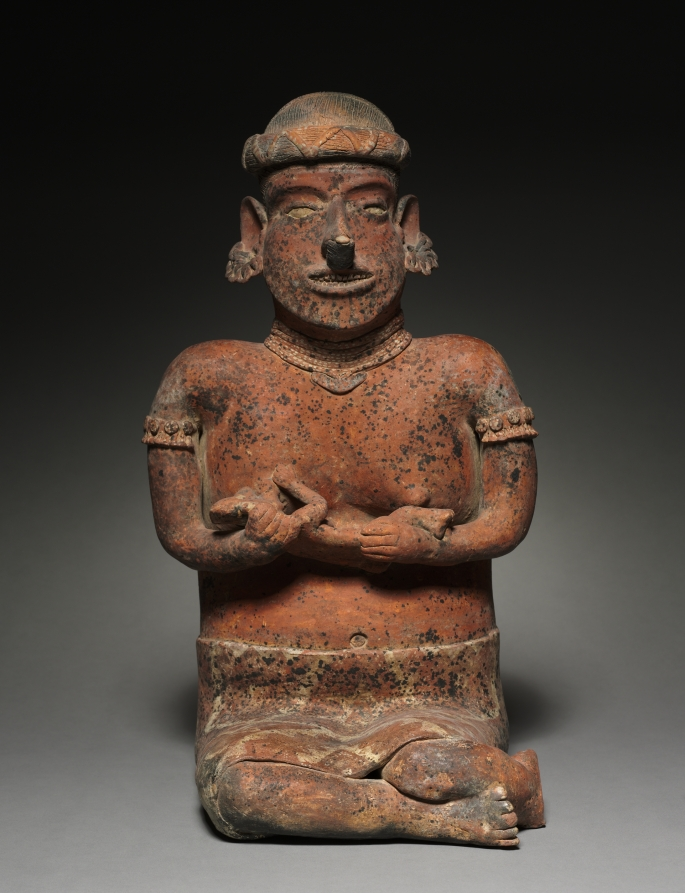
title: Female Seated Figure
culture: Mexico, Nayarit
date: 100 BCE–300 CE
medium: ceramic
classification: Ceramic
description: This couple-extremely fine examples of their kind-may commemorate the marriage of an important person, such as a chief, but could also represent siblings of a chiefly family. Whatever their relationship, their unity is conveyed by their physical similarities, including their jewelry, which marks high social station. The female is unusual in nursing an infant, likely a reference to generational renewal and the continuation of noble bloodlines. The significance of the male’s activity-beating a turtle-shell drum- is not understood.